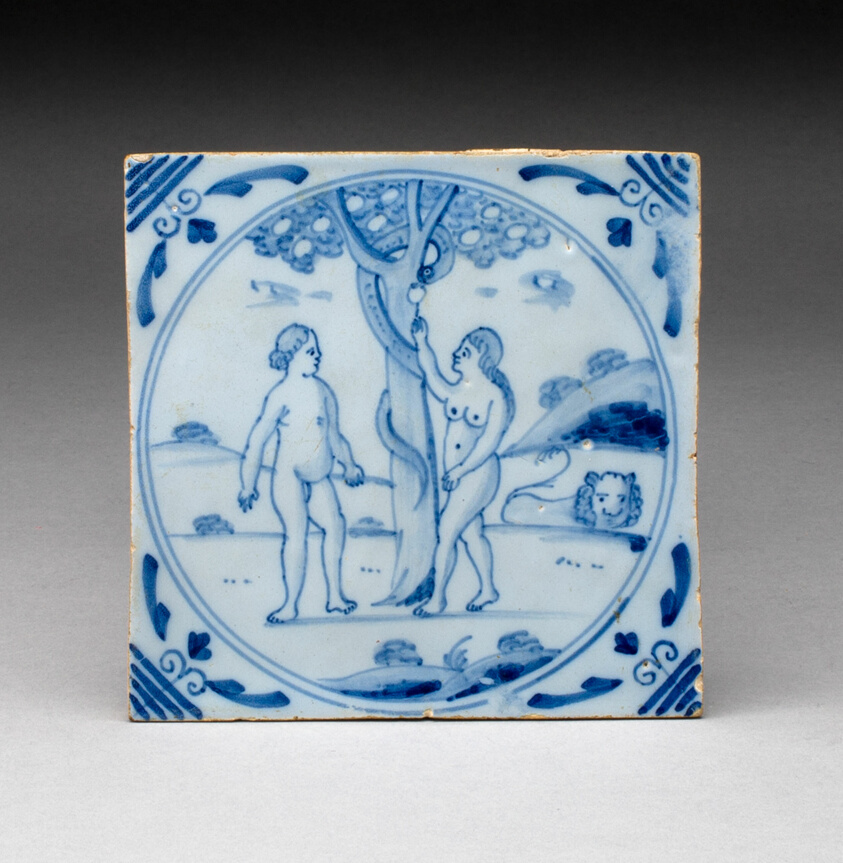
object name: Ceramics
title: Tile with Adam and Eve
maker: England, Lambeth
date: c. 1700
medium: Tin-glazed earthenware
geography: Lambeth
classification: earthenware; tin-glazed ware; european decorative arts; ceramics